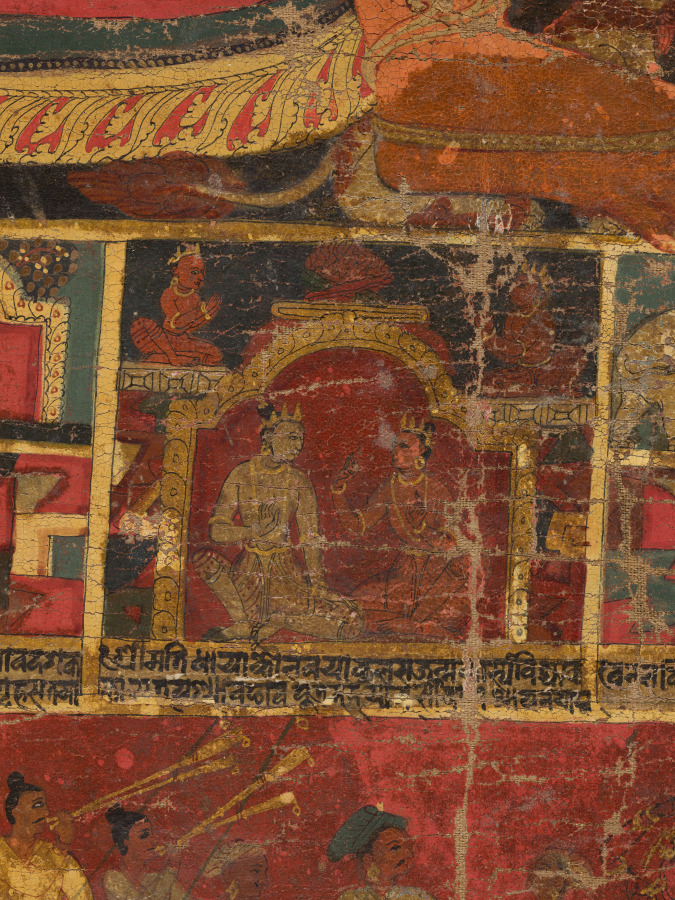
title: Bejeweled Buddha Preaching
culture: Nepal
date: 1648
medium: Gum tempera, ink, and gold on cloth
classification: Painting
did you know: Nepalese devotional paintings on cloth are called "paubha" in the Newari language.